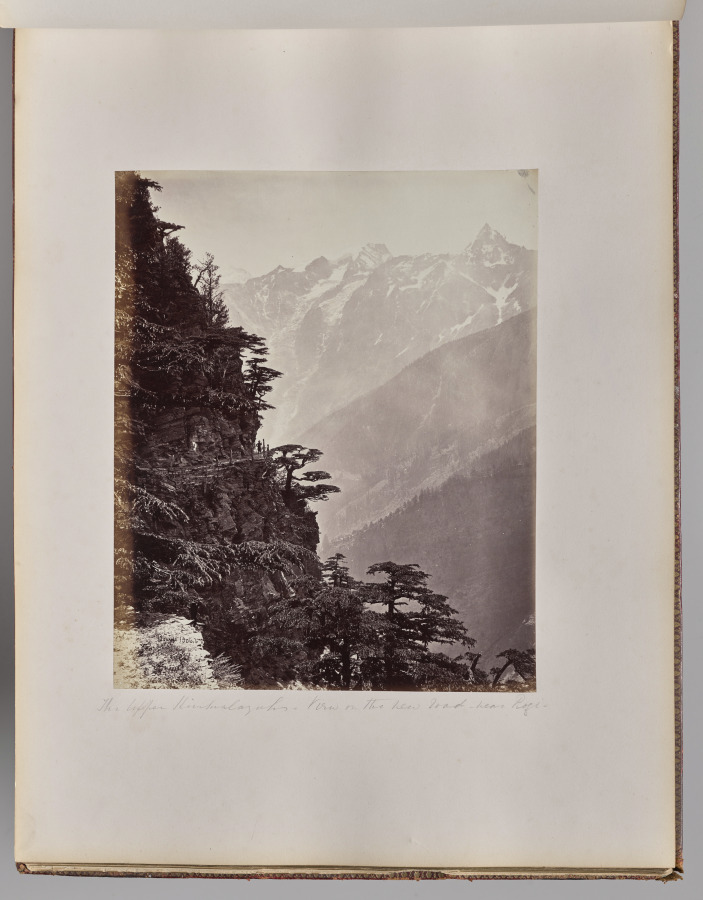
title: The Upper Himmalayahs. View on the New Road Near Rogi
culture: England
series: Photographs of Northern India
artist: Samuel Bourne (British, 1834–1912)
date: 1863–70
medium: albumen print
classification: Photograph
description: The 50 images in this album, all taken in the 1860s, move from the hill towns of the Himalayas down to cities including Lahore (now in Pakistan), Delhi, Lucknow, Agra, Benares (now Varansi), and Calcutta (now Kolkata). Architectural studies of major monuments offer valuable historical records of what sites such as the Taj Mahal and the imperial mosque of the Mughal emperors in Delhi looked like before 20th-century restorations.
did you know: Samuel Bourne, the author of most the images in this album, was a banker in England before he moved to India to become a professional photographer.